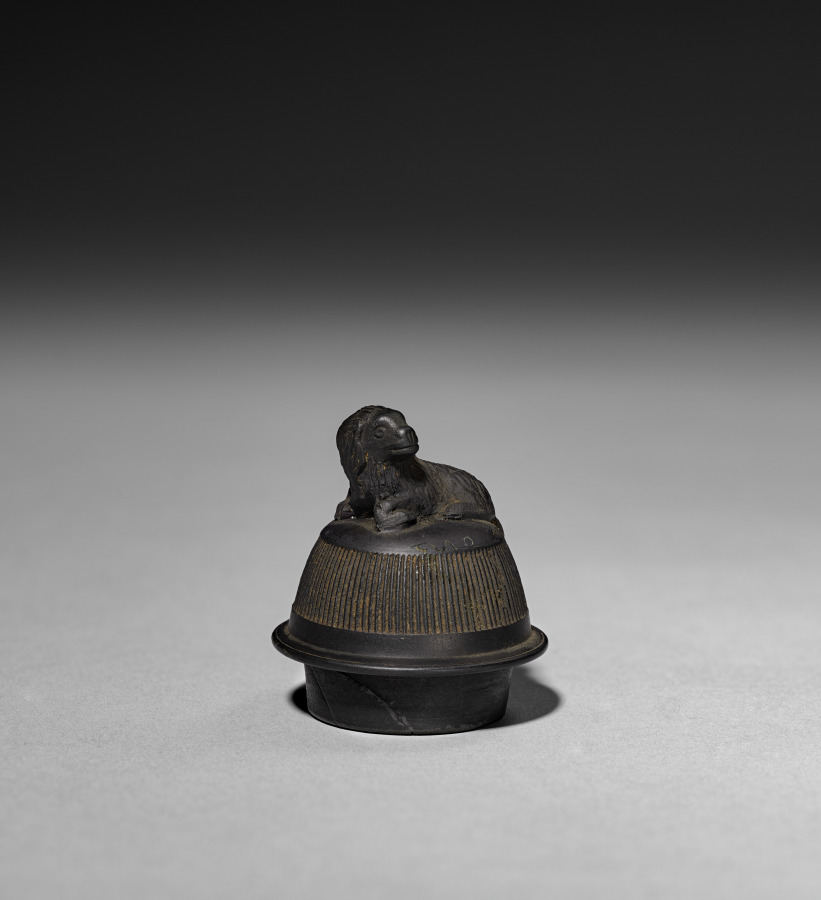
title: Cover for a Tea Caddy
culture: England, Staffordshire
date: c. 1770–80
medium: Black basalt stoneware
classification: Ceramic